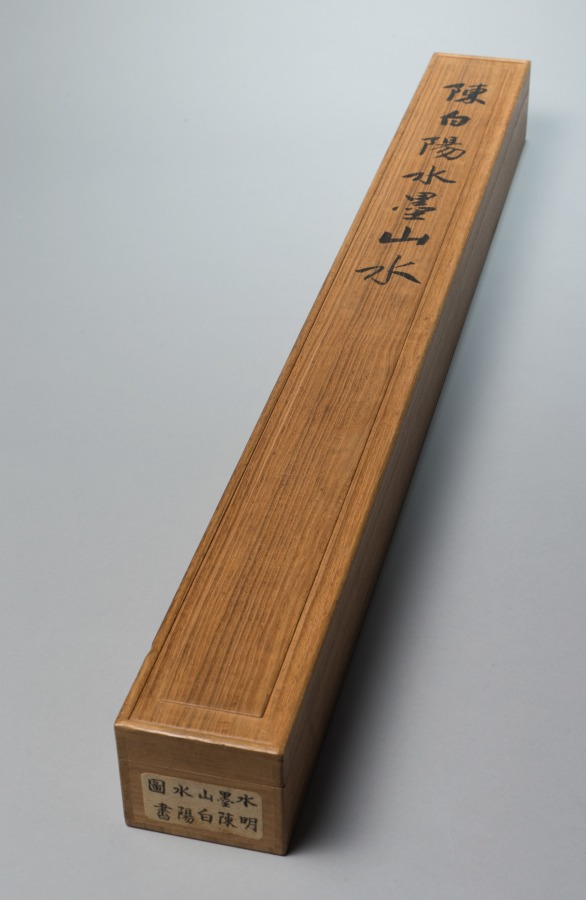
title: Looking for a Monastery in the Misty Mountains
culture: China, Ming dynasty (1368–1644)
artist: Chen Chun (Chinese, 1483–1544)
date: 1500–1544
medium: hanging scroll, ink on paper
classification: Painting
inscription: Artist's inscription, signature, and 2 seals: Row after row of misty trees envelop the Buddhist Monastery./ But the rustic who comes to find it will not lose his way./ Just across the wooden bridge, the dusty world is cut off;/ Among the countless falling petals, birds are singing confusedly. Daofu 道複 composed [this]. [seals] Fufu shi 復甫; Baiyang shanren 白陽山人. trans. WKH/LYSL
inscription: 3 additional unidentified seals.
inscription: 1 additional unidentified seal on the back of the mounting.